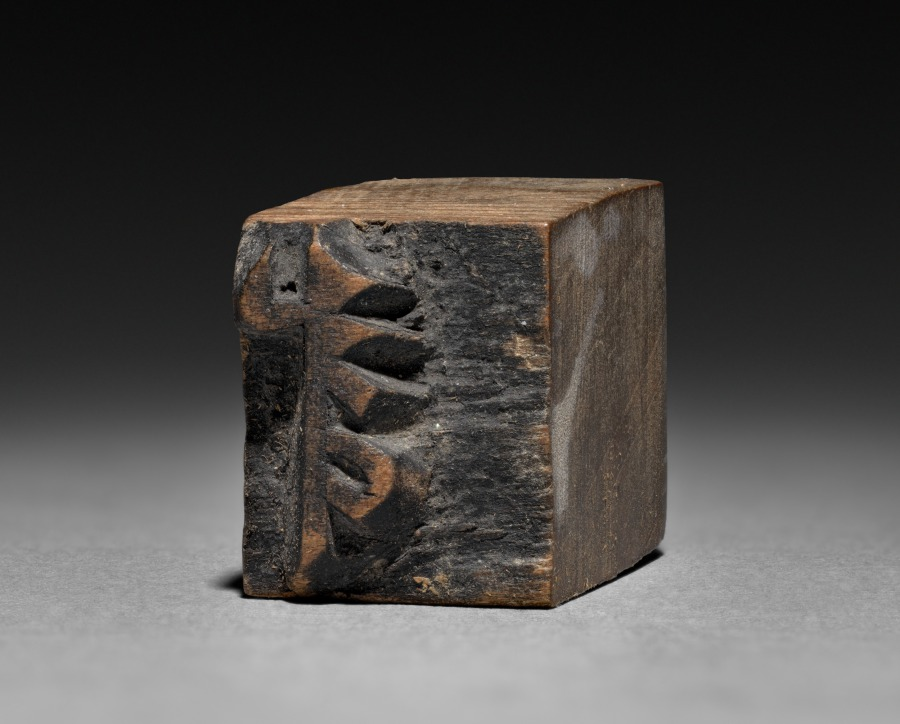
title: Wooden Moveable Type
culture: China, Nigur, 19th century ?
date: probably 1800s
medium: wood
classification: Wood